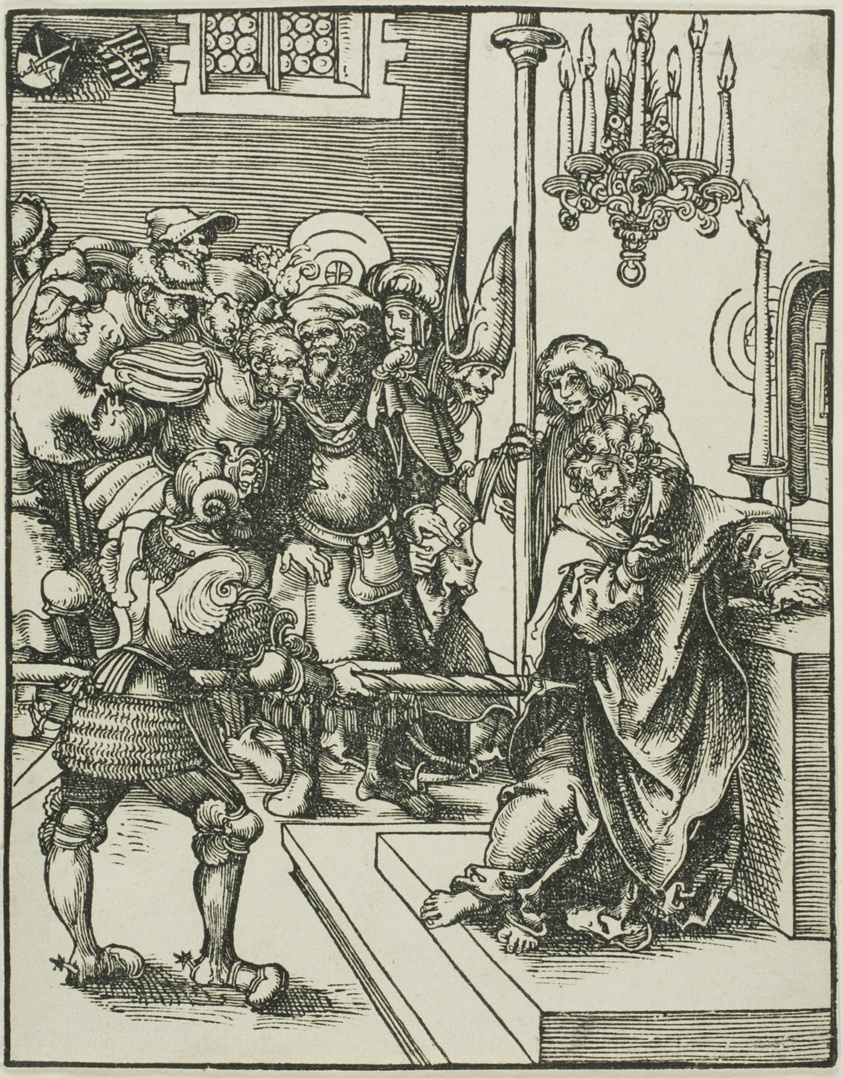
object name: Print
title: Saint Thomas, from The Martyrdom of the Apostles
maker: Lucas Cranach the Elder (German, 1472-1553)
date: c. 1512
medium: Woodcut in black on ivory laid paper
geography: Germany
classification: woodcut; print; prints and drawing